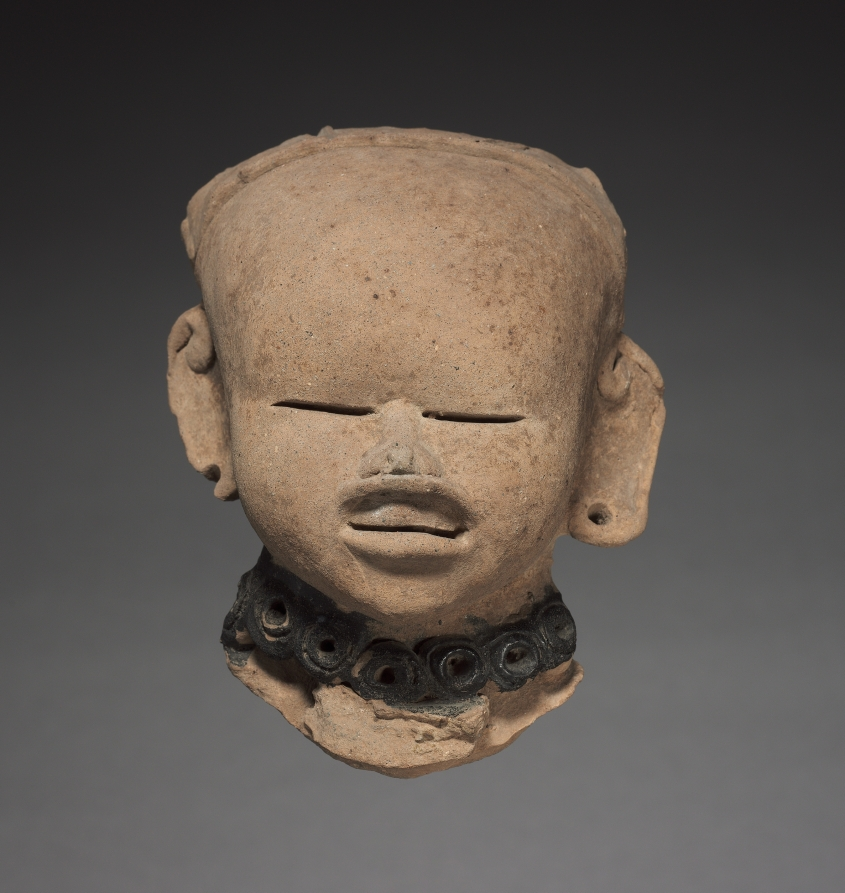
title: Smiling Head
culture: Mexico, Classic Veracruz (Totonac or Tajin)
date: 600–1100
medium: terracotta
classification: Sculpture